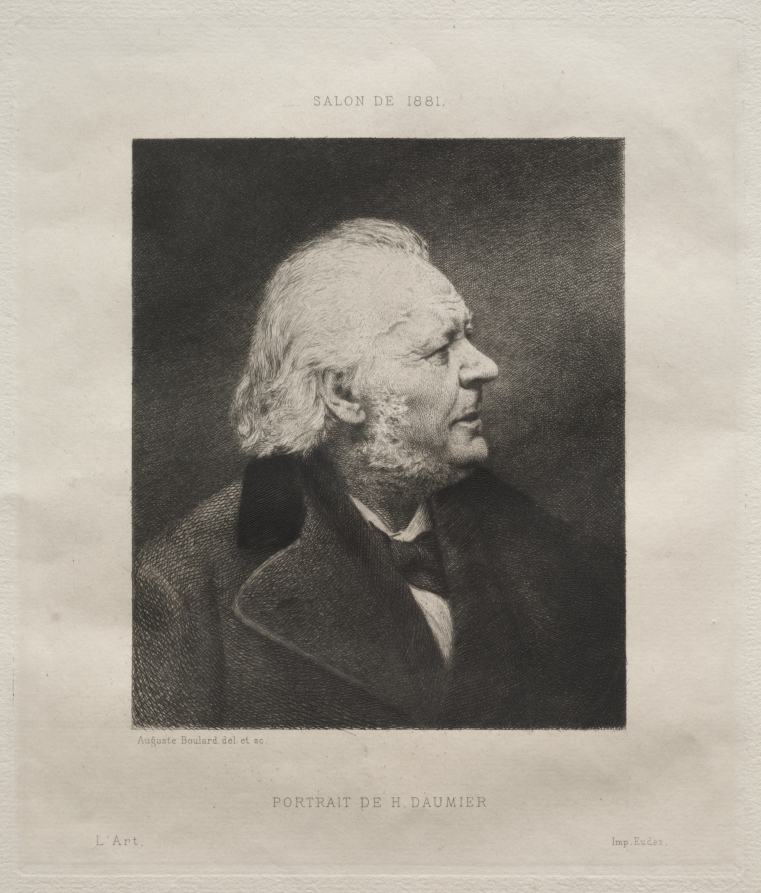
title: Honoré Daumier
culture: France, 19th century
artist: Auguste Boulard (French, 1825–1897)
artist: after Étienne Carjat (French, 1828–1906)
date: 1881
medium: etching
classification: Print